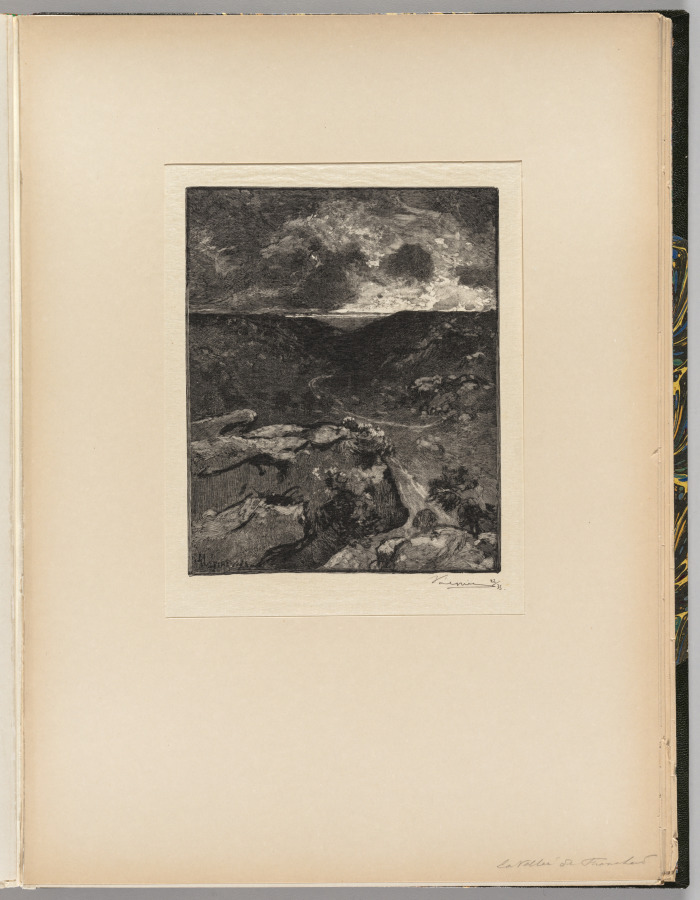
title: Fontainebleau Forest: Franchard Valley (La Forêt de Fontainebleau: La Vallée de Franchard)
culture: France, 19th century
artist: Auguste Louis Lepère (French, 1849–1918)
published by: A. Desmoulins, Published in Revue Illustrée, 1887–90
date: 1890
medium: wood engraving from bound volume of 34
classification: Bound Volume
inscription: In block, lower left: A. LEPÈRE; below image, lower right, in black ink: ALepère 22/35; on window mat, lower right, in graphite: La vallée de Franchard